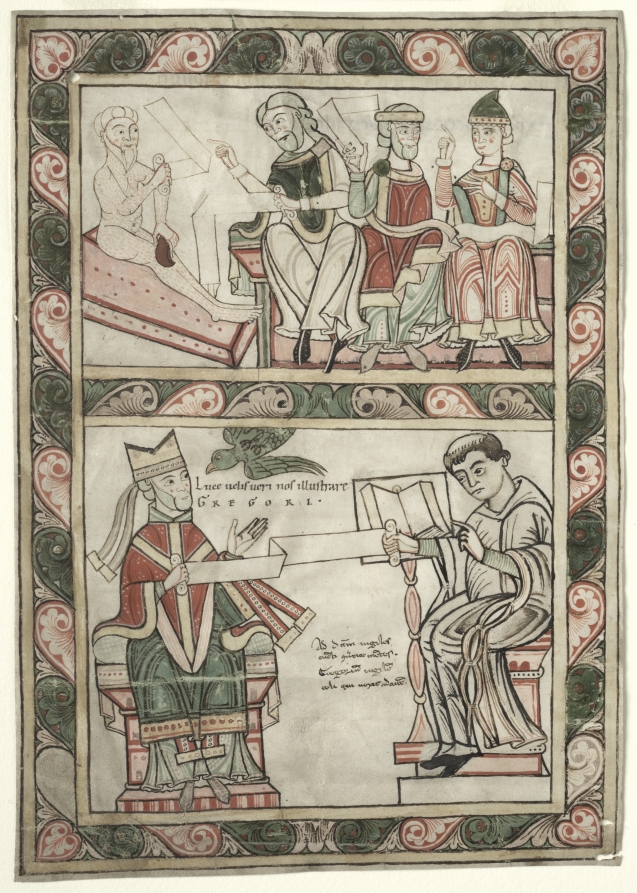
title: Title Page of St. Gregory's "Moralia": Job Visited by His Three Friends (above) and Gregory the Great and His Deacon Peter (below)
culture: Switzerland, Monastery of Engelberg, 12th century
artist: probably by Abbot Frowin (Swiss)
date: c. 1143–1178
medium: ink, tempera, and gold on vellum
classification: Manuscript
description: This leaf originally formed the title page of a four-volume Moralia (Commentary on the Book of Job) by Gregory the Great, pope and father of the Latin Church. The books still survive in the library of the Monastery of Engelberg, near Lucerne. Both the copying and illumination of the books are attributed to the hand of Engelberg's greatest abbot, Frowin, who ruled from 1143 to 1178. Frowin seemed to be responsible, either as a writer, illuminator, or donor, for nearly 30 manuscripts still preserved at that monastery.